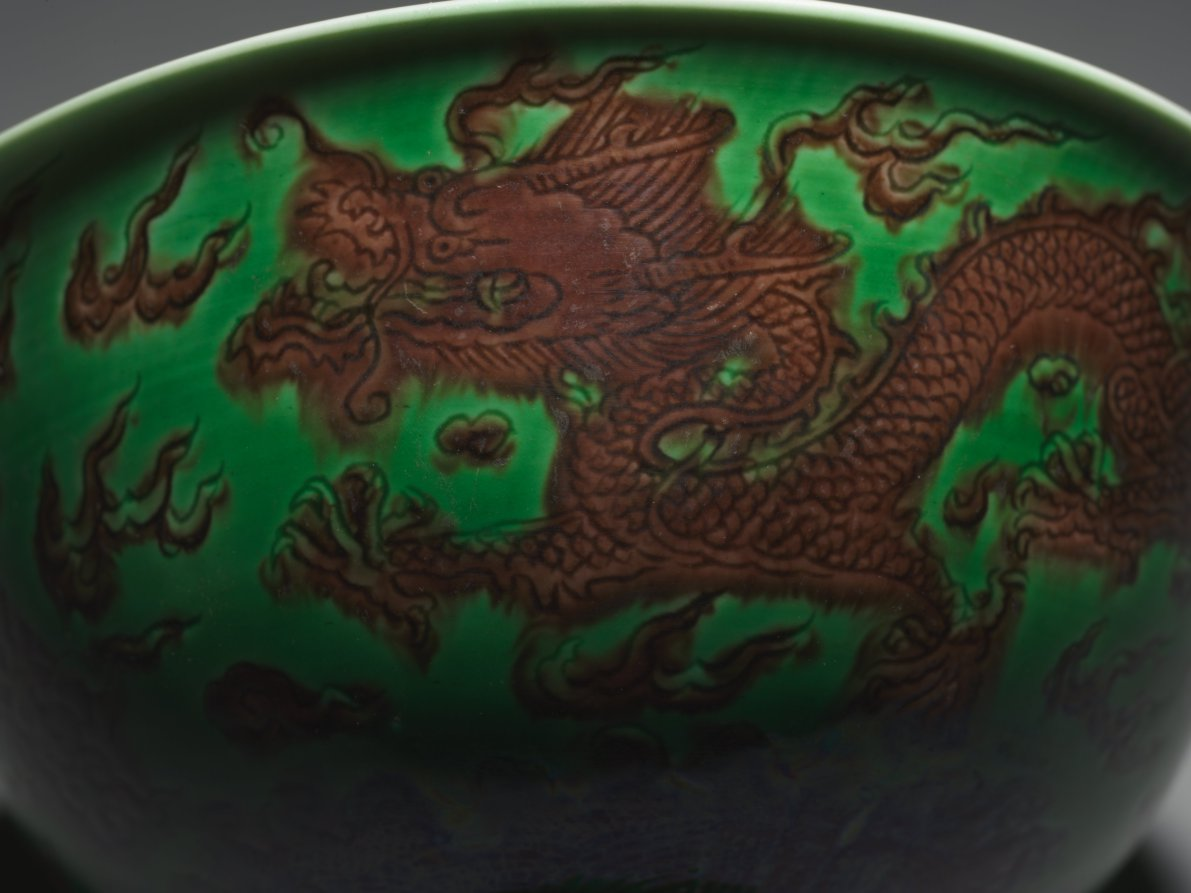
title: Bowl with Dragons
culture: China, Jiangxi province, Jingdezhen kilns, Qing dynasty (1644-1911), Kangxi mark and reign (1662-1722)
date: 1662–1722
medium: porcelain with incised and enamel decoration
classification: Ceramic